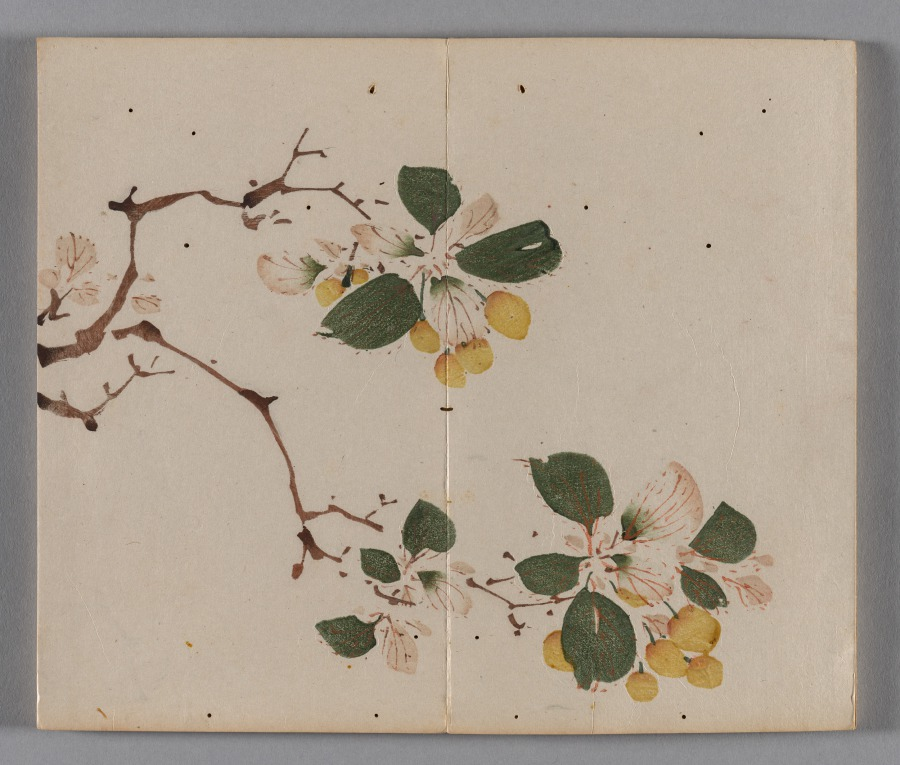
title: Ten Bamboo Studio Painting and Calligraphy Handbook (Shizhuzhai shuhua pu): Fruit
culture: China, Qing dynasty (1644-1911)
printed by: Hu Zhengyan (Chinese, c. 1584–1674)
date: 1633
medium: Woodblock-printed book; ink and colors on paper; first edition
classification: Print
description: Color printing reached a level of perfection in the early 1600s, as seen in this Ten Bamboo Studio Collection of Calligraphy and Painting and the Mustard Seed Garden Manual of Painting (printed 1679 and 1701). The painterly quality, precision in registering (aligning) the woodblocks, and harmonious colors made them the most successful color print editions in Chinese history. Both editions were printed and compiled in Nanjing, spread nationwide, and had a great impact on the arts in Japan and Korea.